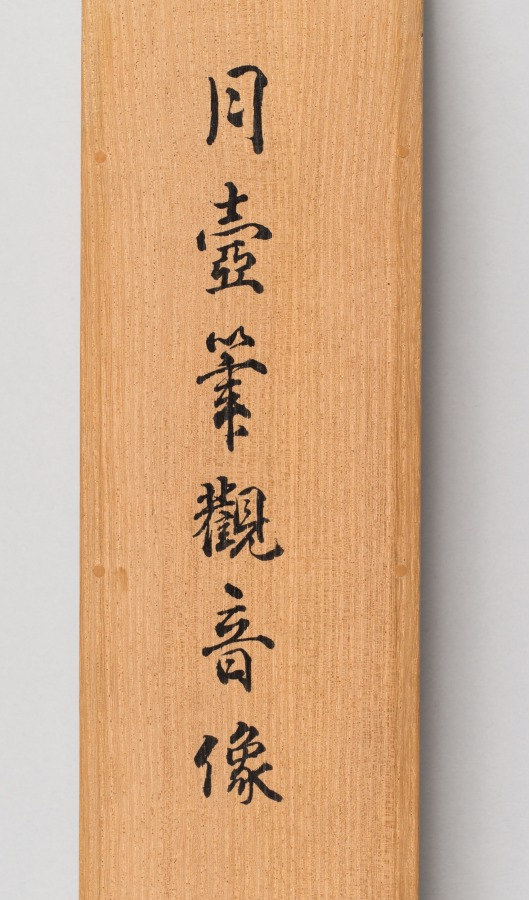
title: White-Robed Guanyin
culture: China, Southern Song dynasty (1127-1279)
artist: attributed to Zhang Yuehu (Chinese, active 1200s)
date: late 1200s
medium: Hanging scroll; ink on paper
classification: Painting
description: The figure here sits on a rocky elevation representing Potalaka in the Southern Sea, Avalokitesvara’s island home. A vase with a bamboo sprig holds pure water, the nectar of life. Bamboo shines through the figure’s halo, a way of seeing the illusionary world through the Buddhist truth. Avalokitesvara (Guanyin in Chinese), the bodhisattva of compassion, was integrated into the Chan Buddhist canon of venerated beings. In this context, the bodhisattva is often depicted in its female manifestation as the White-Robed Guanyin. The worship of the feminine White-Robed Guanyin has its origins on Mount Tianzhu in Hangzhou, where Qian Liu (852–932), ruler of the Wuyue kingdom, established the Upper Tianzhu Monastery to venerate her image.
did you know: As an artist, Zhang Yuehu was better known in Japan than in his own country.